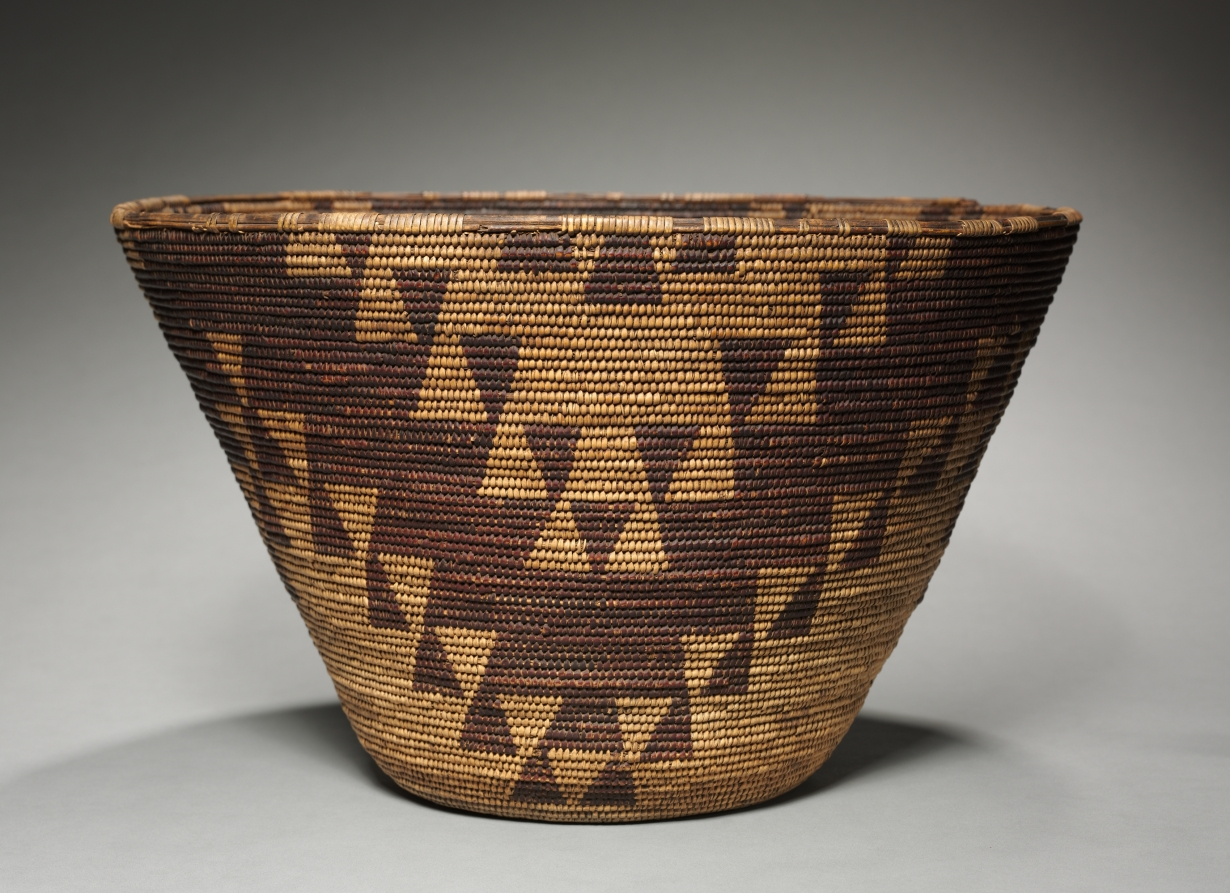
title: Cooking Bowl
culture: California, Maidu, Southern (Nisenan), Unassigned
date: Unassigned, before 1917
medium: redbud, coiled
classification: Basketry